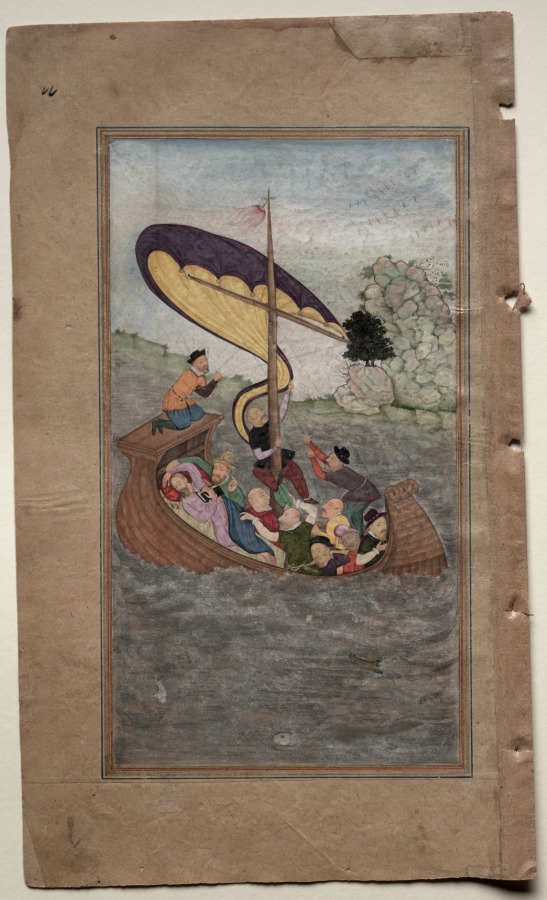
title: Jesus being awakened during a tempest on the Sea of Galilee (folio 77 recto), from a Mirror of Holiness (Mir’at al-quds) of Father Jerome Xavier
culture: Mughal India, Allahabad, made for Prince Salim (1569–1627)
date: 1602–4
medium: Gum tempera, ink, color, and gold on paper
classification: Manuscript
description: The boat carrying Jesus and his apostles encountered a tempest on the Sea of Galilee. As the apostles began to panic and fear that their boat would sink, Jesus continued to sleep peacefully. The painter illustrates the moment before Jesus was awakened by his apostles, who are frightened by the storm and perhaps also by the crocodile that sticks its head out of the waves. The power of the gale is indicated by the violently twisting sail and the Mughal-style tassel that swings at the top of the mast. This composition is the only one in the Cleveland manuscript to be based on an identifiable European print.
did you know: The apostle wearing green appears to be seasick.